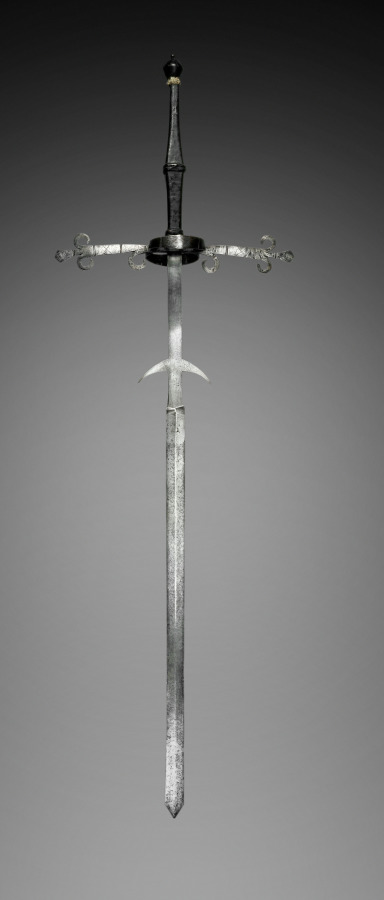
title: Two-Handed Sword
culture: Germany, second half 16th Century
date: 1550–1600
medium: steel, leather and wood grip, bronze pommel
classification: Arms and Armor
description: The two-handed sword, originally a weapon of war for specialist infantry, is so named because two hands were required to wield it. By the late 1600s, these enormous swords assumed a largely ceremonial or bodyguard function.